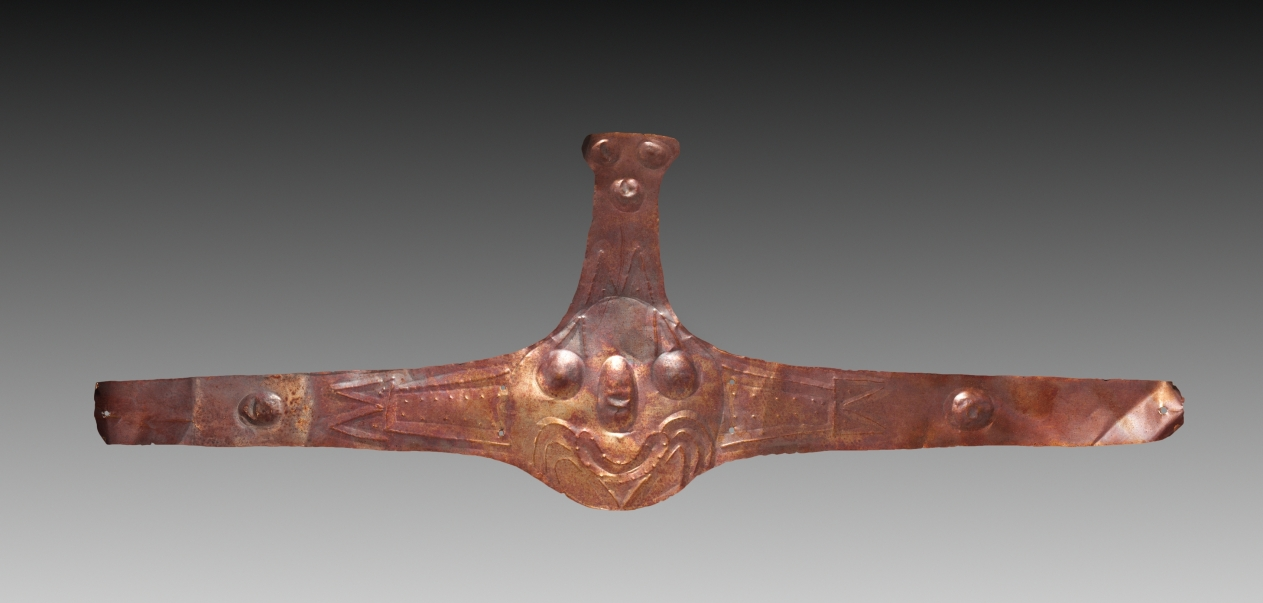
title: Forehead Ornament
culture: Peru, South Coast, Nasca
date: 100 BCE–700 CE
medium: hammered gold alloy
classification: Jewelry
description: Nasca figures, like one on a bowl nearby, are shown wearing such forehead ornaments and mouth masks similar to these. The mouth mask hung from the nasal septum, the oval opening surrounding the mouth and the bristles positioned as feline whiskers, here transformed to serpents. Both were cut from sheet gold; details were worked freehand while the sheet rested on a soft surface.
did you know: Tumbaga is an alloy made by blending gold with copper, which may give the gold a rosy hue.